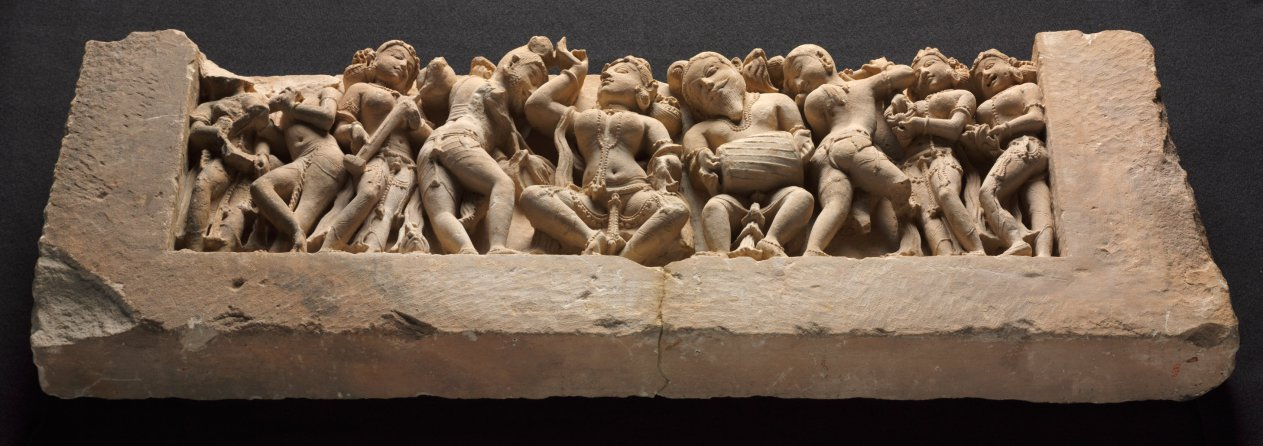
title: Frieze with Dancer and Musicians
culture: Northwestern India, Rajasthan, Sikar, Harshagiri, 10th century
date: c. 973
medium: sandstone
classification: Sculpture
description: A dancer, who strikes a pose in the center, is accompanied by a full orchestra of musicians in lively variegated poses. At the far left, a woman plays the cymbals, her mouth open in song. Twisting turning postures of figures wrought in high relief with little background space behind them are characteristics of Indian sculpture from the medieval period. Music and dance were important components of devotional temple activities; they were considered as pleasing to the divinity and attractive for devotees as the works of sculpture and architecture.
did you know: The twisting, dynamic postures of the musicians in this frieze may visually echo the joyful music they are playing together.